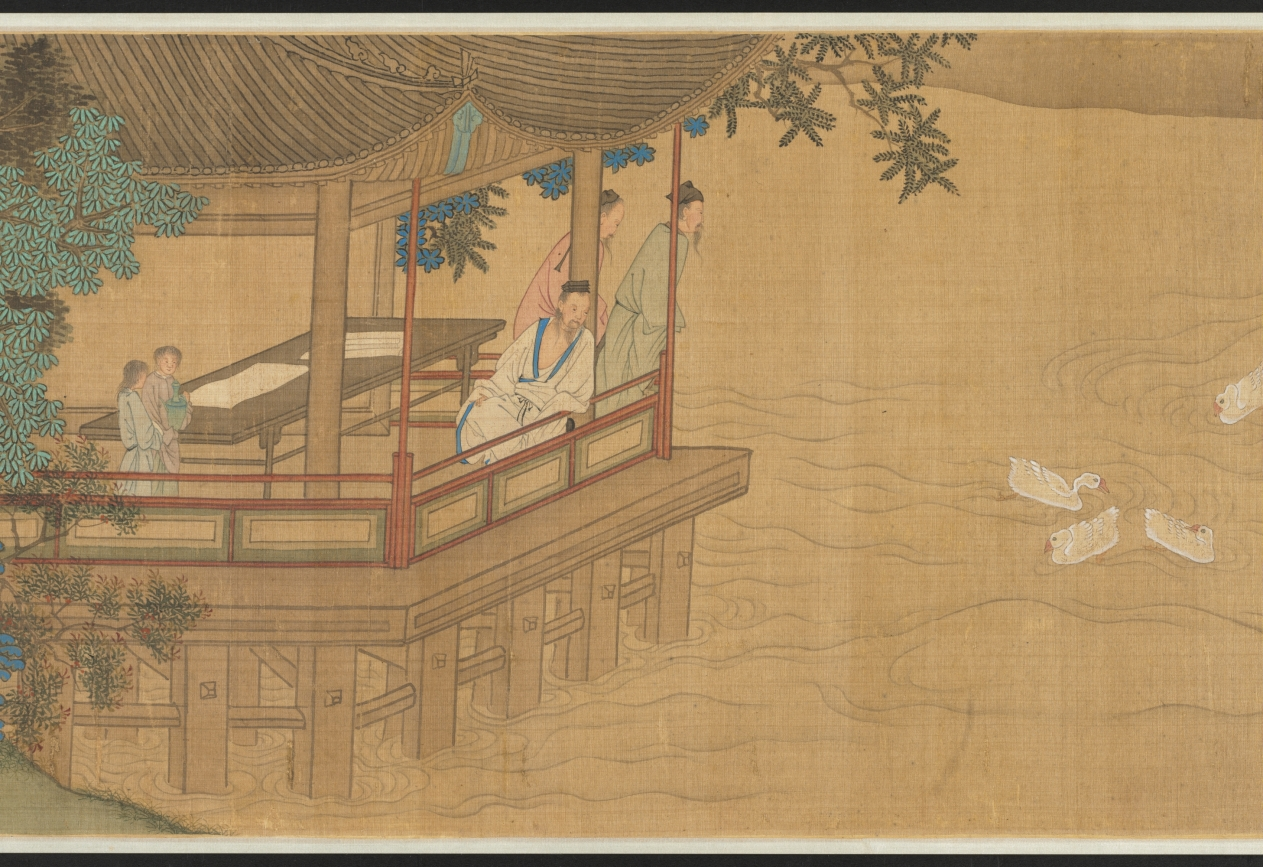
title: Purification at the Orchid Pavilion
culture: China, Qing dynasty (1644-1911)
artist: Fan Yi (Chinese, c. 1615–before 1688)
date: 1671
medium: Handscroll; ink and color on silk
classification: Painting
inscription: Artist's inscription, signature, and 2 seals: Painted by Fan Yi of Zhongfu during the second month of winter of the xinhai year [1671]. [2 seals] Fan Yi zhi yin, Zi yu yi.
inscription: Title on the frontispiece by Monk Yueshan (1629-1709).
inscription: 3 colophons and 13 additional seals: 1 colophon, dated 1707, and 6 seals of Yueshan; 2 colophons and 3 seals of Wong Kwan-Shut (Huang Junshi) 黃君實 (b. 1934); 2 seals of Fu Shen 傅 申 (b. 1937); 2 seals of Tessai Tomioka 富岡鐵齋 (1836-1924).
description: By the 1600s, the historic gathering at Lanting, Zhejiang province, in 353 CE was a common theme in Chinese painting. Originally based on a composition attributed to Li Gonglin (1049– 1106), now lost, Wu school artists revived the theme. Fan Yi, the brother of the artist Fan Qi from Nanjing, used delicate brushwork and luminous colors to depict the spring gathering.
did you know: The gathering’s host is in the Orchid Pavilion at the end of the scroll, representing an episode known as “Wang Xizhi Watching the Geese 王羲之觀鵝圖.”